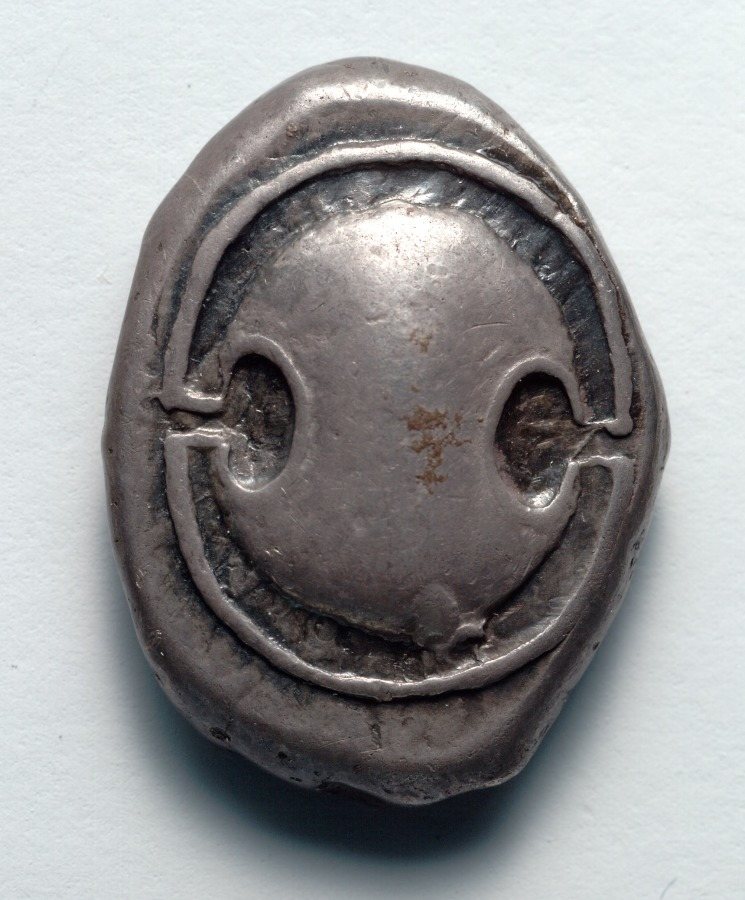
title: Stater: Boiotian Shield (obverse); Volute-Krater (reverse)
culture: Greek, minted at Thebes (Boiotia)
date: 395–387 BCE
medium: silver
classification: Coins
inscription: Θ | Ε